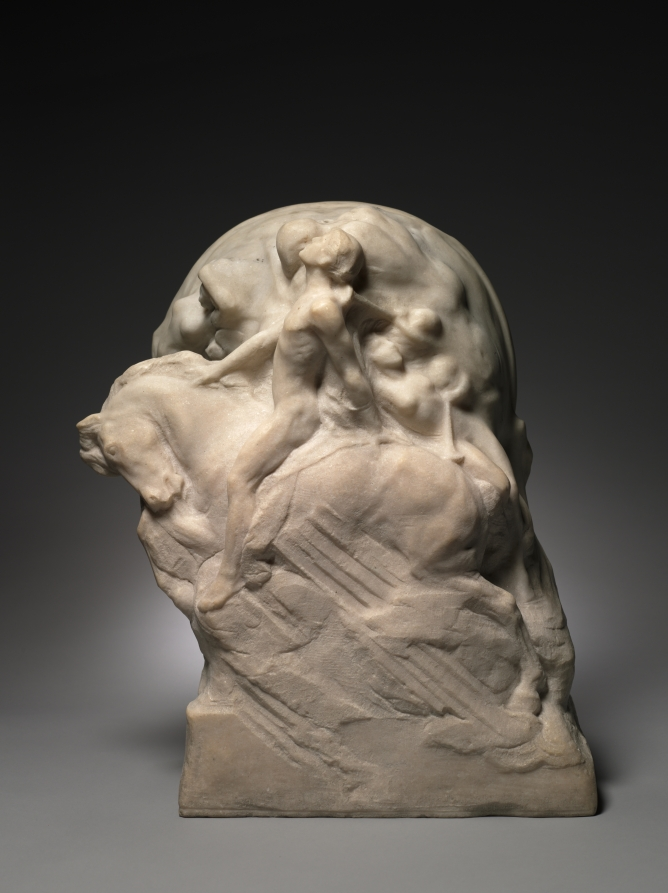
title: Dawn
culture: America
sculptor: Chester Beach (American, 1881–1956)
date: 1912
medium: marble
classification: Sculpture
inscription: Signed on side: CB (monogram) Roma 1912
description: Created while Chester Beach was living in Rome, Dawn features a nude man on horseback against a background of human forms emerging from a cloud of rolling mist. Although carved in the round from a block of marble, the sculpture has one primary view.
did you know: Chester Beach traded two of his sculptures to a farmer in Brewster, NY, obtaining land where he built his studio and a summer home.